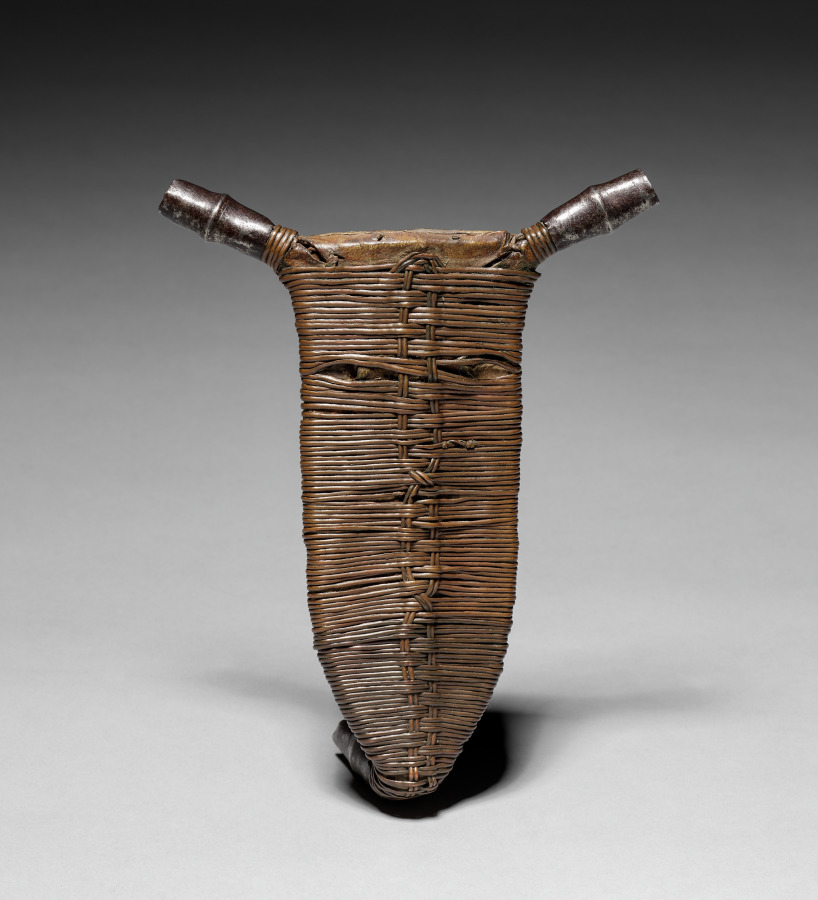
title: Sheath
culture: Africa, Central Africa, Democratic Republic of the Congo, Ngbandi-style maker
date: c. 1900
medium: Copper alloy and rawhide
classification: Arms and Armor